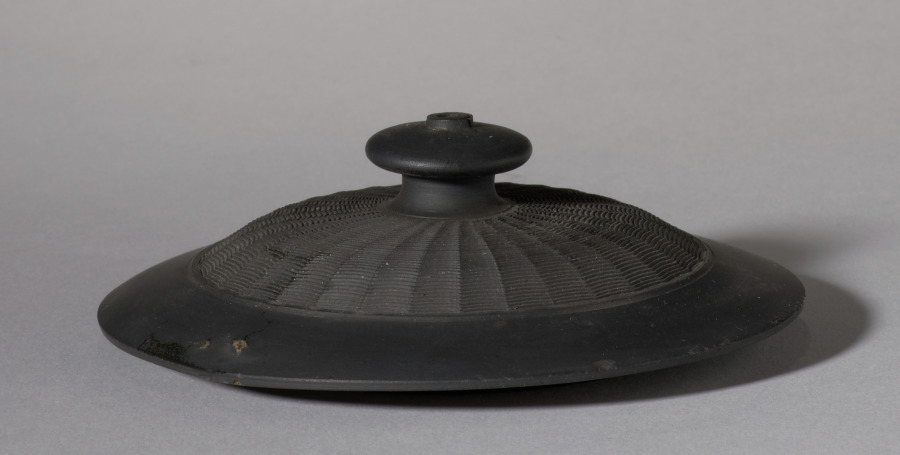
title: Teapot (lid)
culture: England, Staffordshire, 19th century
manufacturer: Davenport Pottery and Porcelain Factory (British)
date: 1800s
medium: black basalt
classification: Ceramic